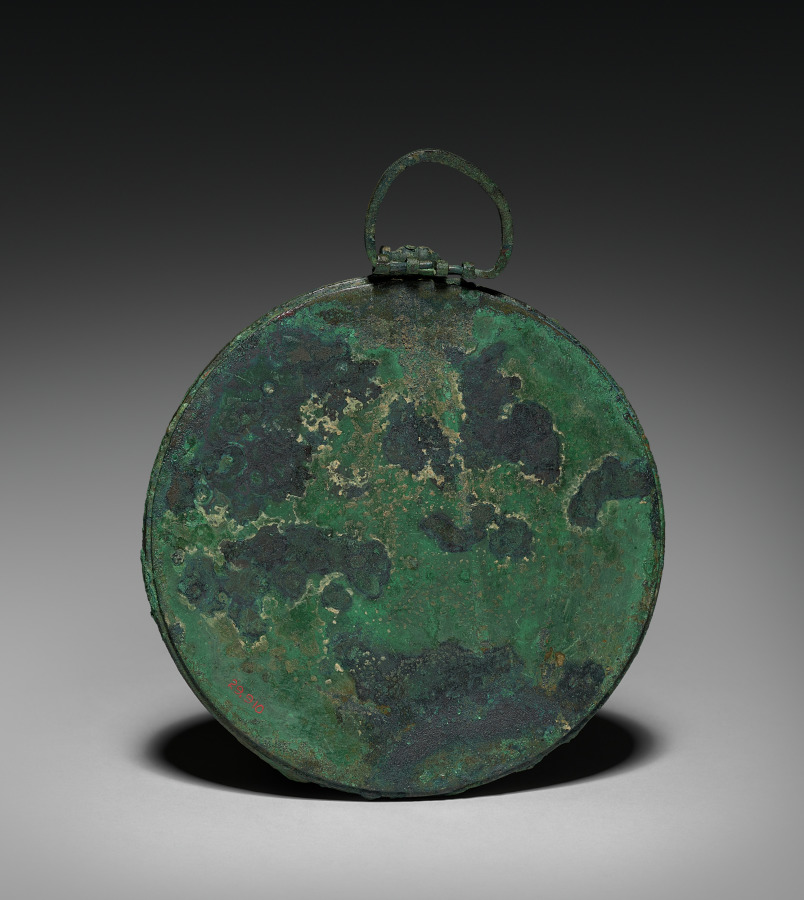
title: Mirror Case with Cover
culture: Greece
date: 300s BCE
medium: bronze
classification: Metalwork